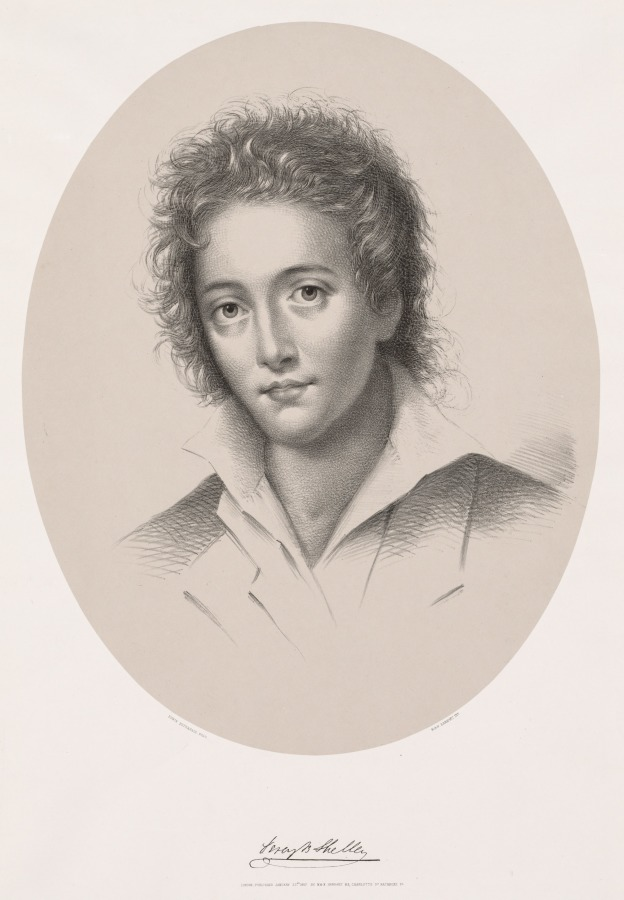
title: Percy Bysche Shelley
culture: England, 19th century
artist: Edwin Beyerhaus (British)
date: 1867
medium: lithograph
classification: Print